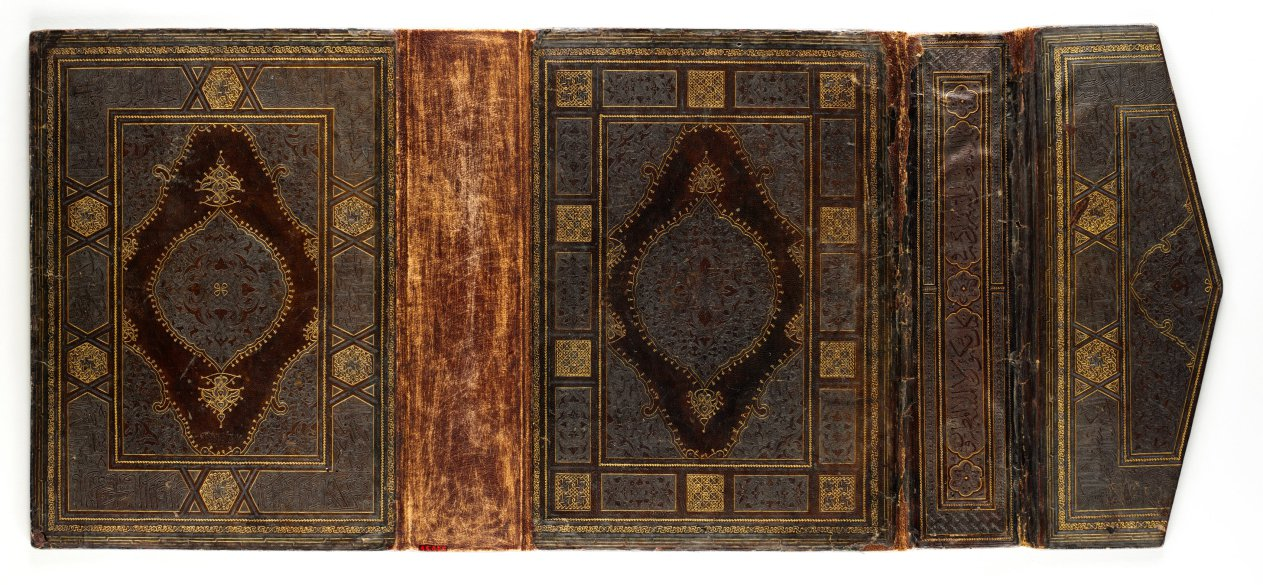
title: Bookbinding for a Qur'an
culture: Turkey, Istanbul, Ottoman period, 15th century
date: 1460–1500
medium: leather over paper pasteboards; outer cover tooled, blue paint; inner covers openwork designs over colored papers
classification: Book Binding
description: Islamic book covers generally have a triangular flap attached to the rear cover of the binding which is tucked under the front cover to protect the outside edge of the pages. The outer covers of this particularly elaborate example feature panels with Qur'anic inscriptions, interlace patterns, and a central medallion filled with floral and arabesque designs. The inner covers offer a superb example of leather openwork, a leather technique that originated in northeastern Iran in the 1400s.